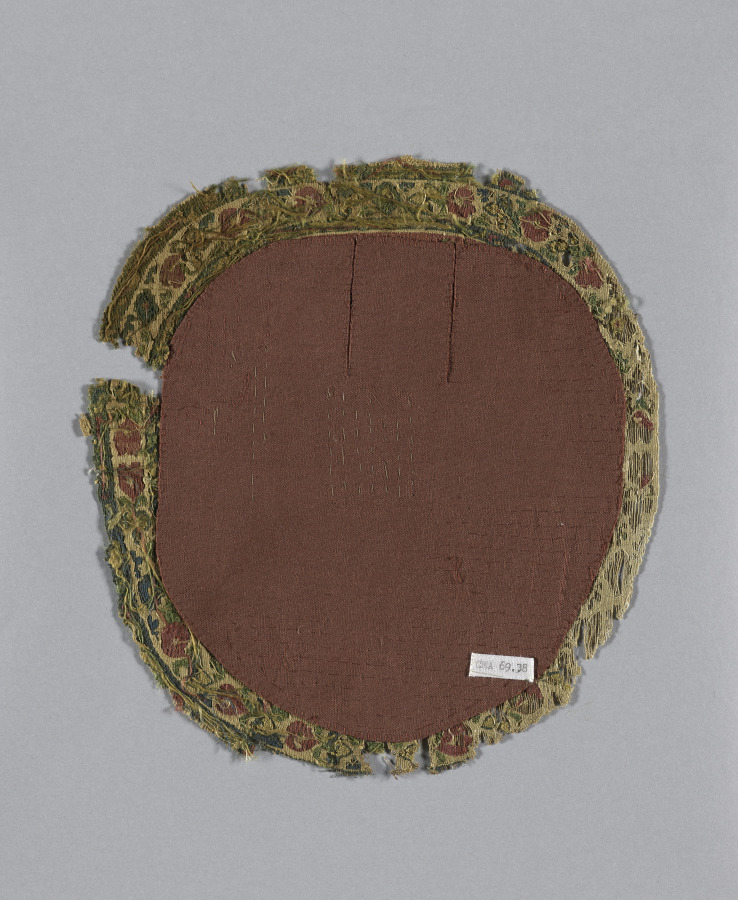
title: Segmentum from a Tunic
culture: Egypt, Abbasid period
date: 750–99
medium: tapestry; linen and wool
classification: Textile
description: A fierce lion with a pronounced mane takes down a large bull on a purple red ground with stylized trees and plants. Both animals appear to be facing us, the viewer. The border displays a formal wreath of rosettes. This roundel, or circular decorative element, and two additional matching examples suggest that they originally decorated the front and back of a tunic. The scene may be an abbreviated reference to the royal hunt, one of the pleasures of the court that served as propaganda to legitimize the sovereignty of rulers by confirming their ability to control natural resources.